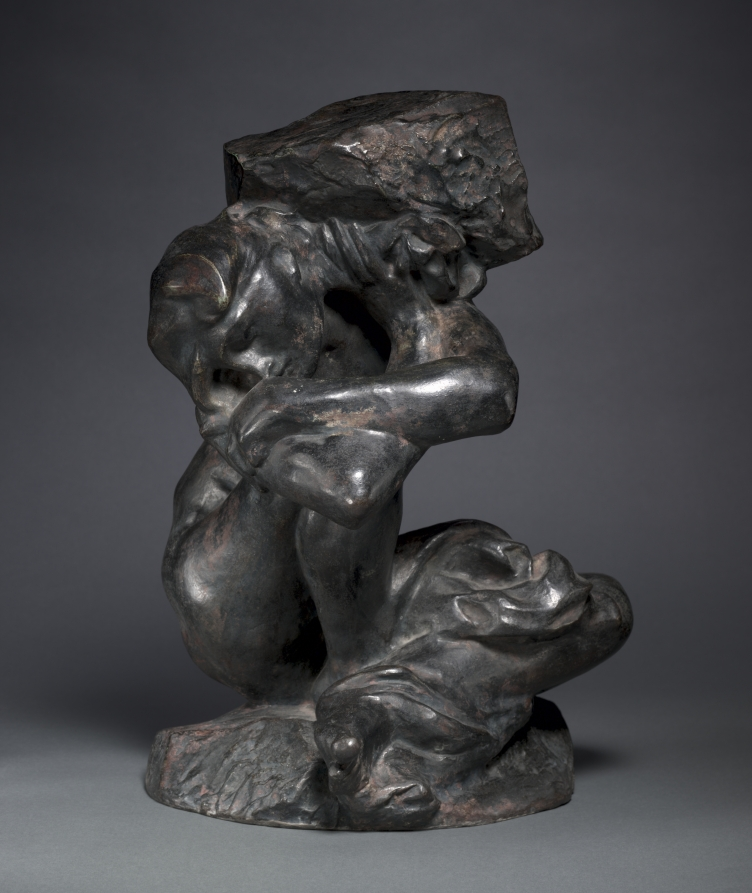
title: Fallen Caryatid Carrying Her Stone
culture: France, 19th century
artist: Auguste Rodin (French, 1840–1917)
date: 1880–81?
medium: bronze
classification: Sculpture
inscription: on base, right front: Alexis Rudier/Fondeur, Paris; left rear, on base: A. Rodin. Sticker on inside: P. Navez Exposition de Pittsburgh Caryatide Musée Rodin No. 764.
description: A caryatid is a column in classical Greek architecture carved to resemble a female figure. Rodin originally designed Fallen Caryatid Carrying Her Stone to serve as one of the figures on his monumental sculptural doorway The Gates of Hell. While Greek caryatids are typically draped, Rodin stripped the body of clothing and depicted the caryatid crushed under the weight of a stone, symbolically suggesting a state of physical suffering or emotional anguish. He exhibited Fallen Caryatid as an independent sculpture as early as 1883 and produced multiple versions in marble and bronze.